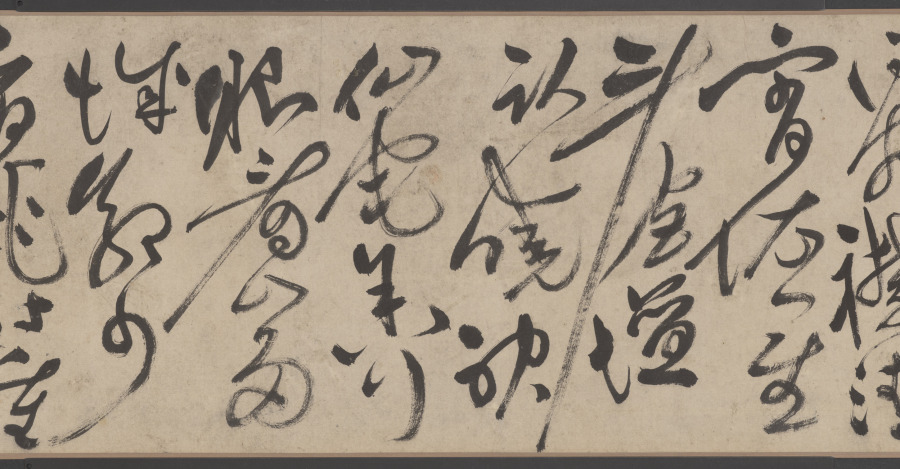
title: Retreat on an Autumn Day, in Cursive Script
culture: China, Ming dynasty (1368–1644)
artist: Zhu Yunming (Chinese, 1460–1527)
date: dated 1523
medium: Handscroll; ink on paper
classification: Calligraphy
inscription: 款識：讌於從一堂，爛漫醉書。癸未（1523）七月晦日也。枝山允明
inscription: 《閒居秋日》逃暑應能蹔閉關，未消多把古賢攀。並拋杯酌方為懶，少事篇章恐礙閑。風墮一庭鄰寺葉，雲開半面隔城山。浮生只說潛居易，隱比求（脫「名」）事更艱。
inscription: 《句曲道中》老至誰憐晝錦明，春來聊得客襟清。宵依星斗宮壇臥，曉（脫「入」）神仙宅舍行。眼看山多城郭少，肩挑詩重簿書輕。何時總入煙霞去。不見人間寵辱驚。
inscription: 《登茆峰》下馬門前一振衣，翠微高迥逼清微。雲端洞裡仙人過，月下山中長史歸。金焰暈牀砂氣伏，紫雲穿竇朮芽肥。神方能詠不能遇，一夜爽靈峰外飛。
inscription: 鈐印：「晞哲」、「允明」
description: This masterwork of calligraphy by Zhu Yunming from Suzhou combines two poems by the artist in cursive script style, characterized by its uninhibited, swift, and intuitive brushwork, so powerful that it here dissolved characters into dots or lines. Written from right to left and top to bottom and alternating in light dry to deep saturated ink, single characters may take a whole column or extend into the next one. Following the movement of the brush, they seem to dance over the paper.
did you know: Zhu Yunming stated that he was in an inebriated state when he created this work.